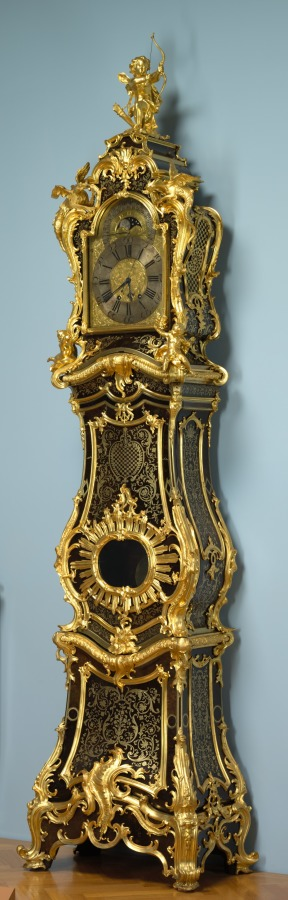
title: Tall- case Clock (Regulateur)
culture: France, Paris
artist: Jean-Pierre Latz (French, 1691–1754)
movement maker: Stollewerck (French)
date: 1744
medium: boulle marquetry with gilt bronze mounts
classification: Furniture and woodwork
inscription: incised on the back of the lowest front panel: .LATZ . A . PARISIIS . FECIT ./. MDCCXLIV; engraved on the clock face: Stollewerck/Paris.